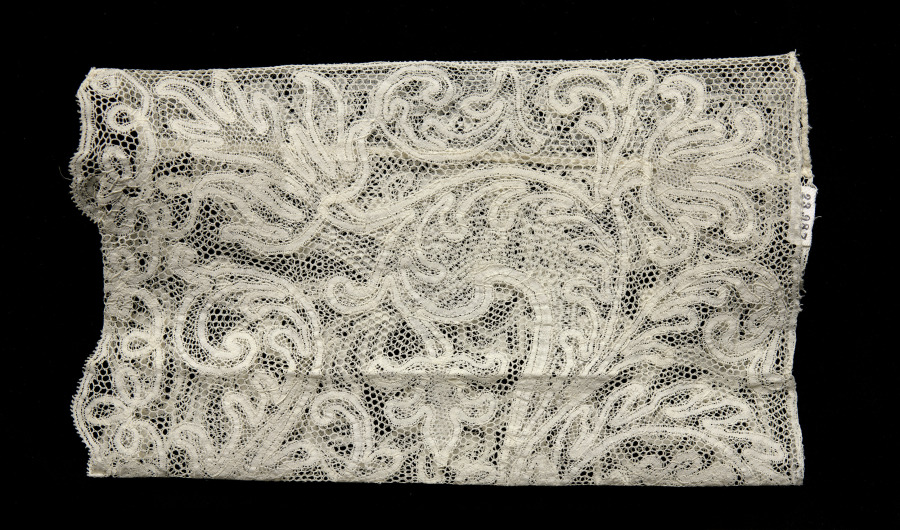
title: Lace Cuff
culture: Italy, Milan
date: 1600s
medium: Bobbin lace (Punto di Milano)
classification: Lace